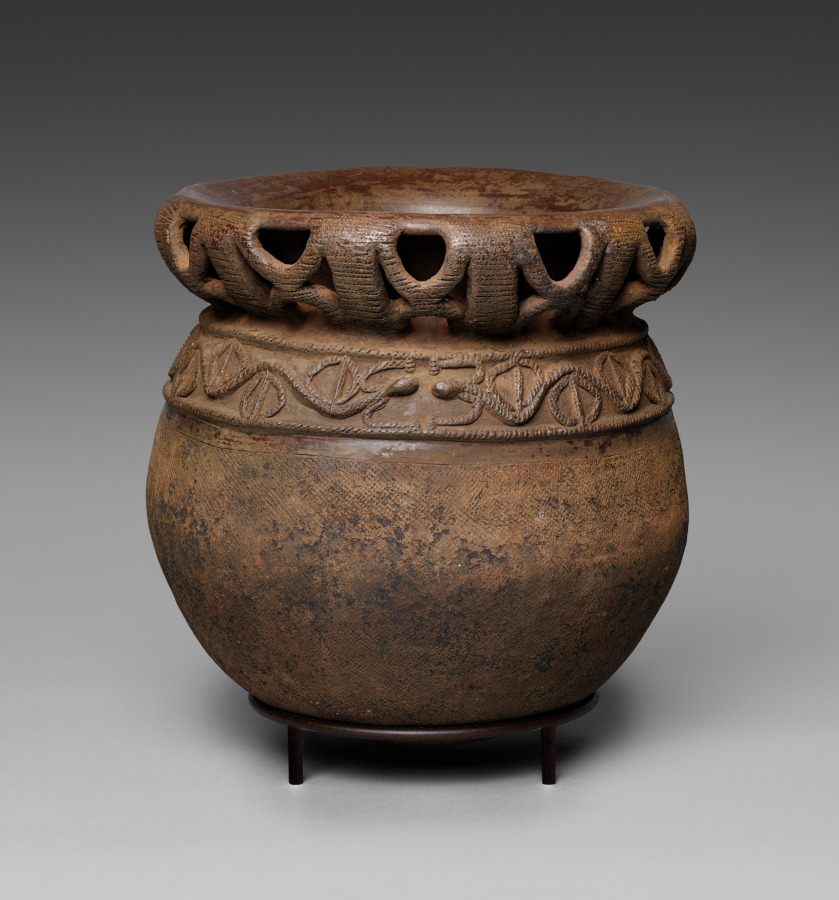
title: Palm Wine Vessel (kuh mendu)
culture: Probably Babessi or Bamessing, Cameroon, Cameroon Grassfields-style pottery, unknown female ceramicist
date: 1900s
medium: Terracotta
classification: Vessels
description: Made by a female potter nearly a century ago, this palm wine vessel represents past and present cultural practices in the Cameroon Grassfields (northwest and western Cameroon). Women in the pottery-producing centers of Babessi and Bamessing hand-built these vessels. Their process alludes to pregnancy, labor, and delivery. Passing knowledge from mother to daughter since at least the 1700s, making pottery is a female economic, social, and artistic contribution. Yet many motifs refer to royal or male power, such as the lizards on this vessel. Elegant palm wine vessels like this were appropriate for ritual and hospitality in Cameroon Grassfields royal courts.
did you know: Serving and sharing palm wine in decorated vessels like this is part of a larger food culture in the Cameroon Grassfields kingdoms that centers on ritual, hospitality, status, and diplomacy.